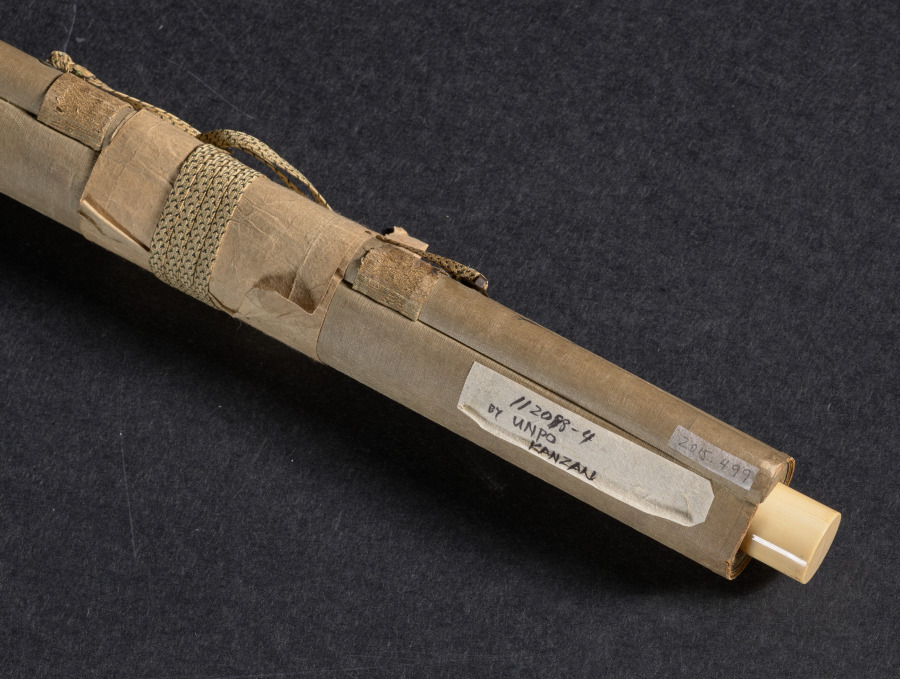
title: Kanzan Holding a Scroll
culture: Japan, Muromachi period (1392–1573)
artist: Unpo Shūkū (Japanese, active 1400s)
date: 1400s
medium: hanging scroll; ink on paper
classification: Painting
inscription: signed: "Unpo"